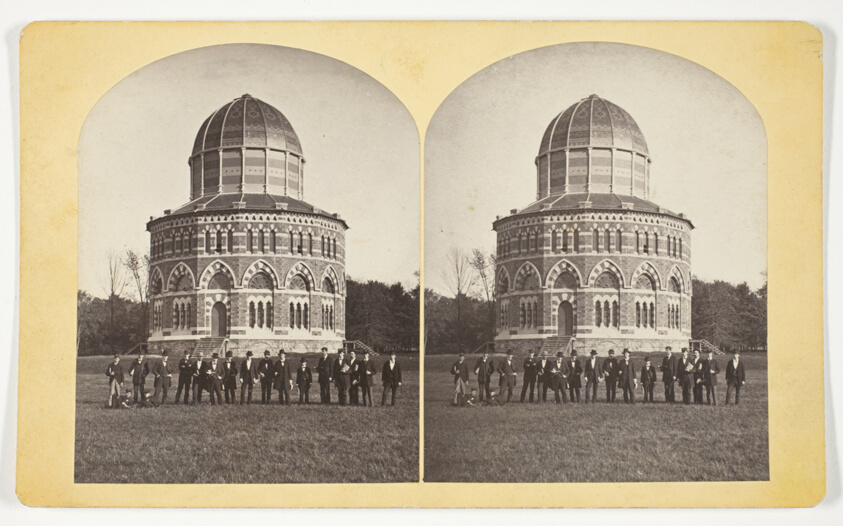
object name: Photograph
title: Untitled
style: 19th century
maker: Artist unknown; European, late 19th century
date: 1875/99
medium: Albumen print, stereo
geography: Western Europe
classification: photography; photograph